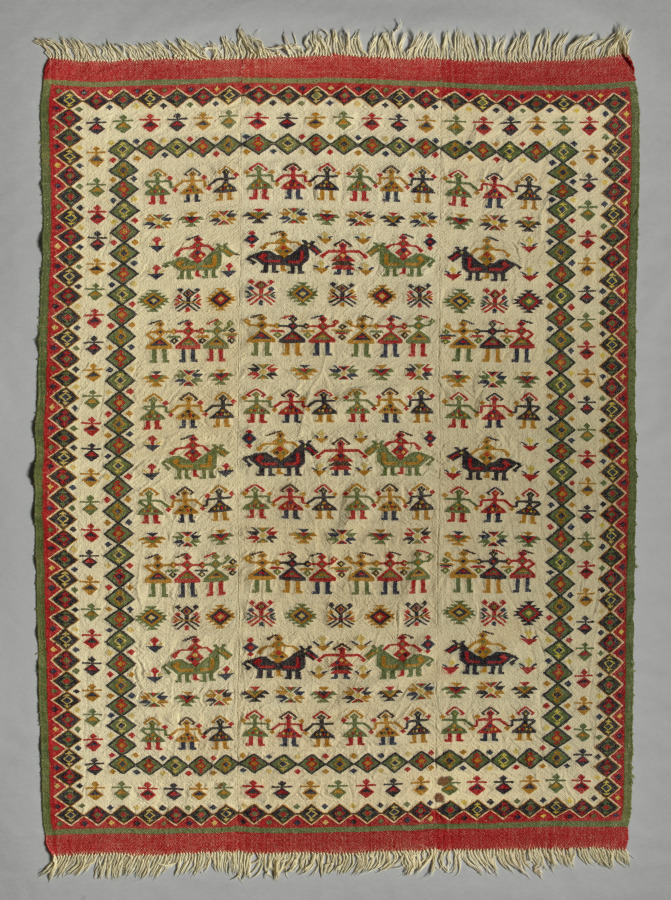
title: Blanket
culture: Greece, Crete, 19th century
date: 1800s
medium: wool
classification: Textile